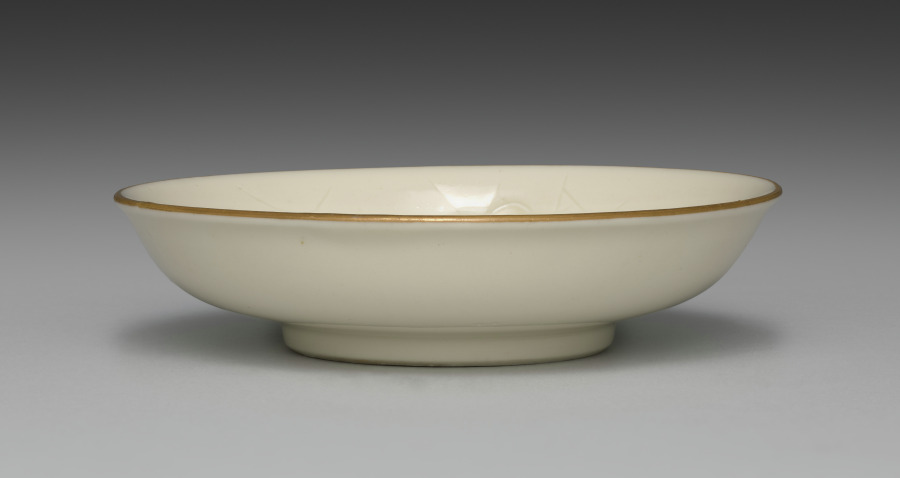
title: Small Dish from Dining Set with Plum Blossoms and Cracked-Ice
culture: Japan, Meiji period (1868–1912)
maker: Seifū Yohei II (Japanese, 1844–1878)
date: c. 1875–78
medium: Porcelain with molded designs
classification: Ceramic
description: Each item in this set has a delicate low-relief design of flowering plum branches over scattered, intersecting lines meant to resemble the cracked-ice surface of a frozen body of water and is signed on the base in gold pigment. While Yohei II produced many fine works in underglaze blue, like those produced by Kiyomizu Shichibei, he also made works in quite different styles later in his career, from the early 1870 s. In 1873, he was appointed purveyor to the Industrial Center of Kyoto Prefecture, a designation associated with Kyoto’s efforts to reach an international market through the port of Kobe; and from 1875 until his death, he was involved in national-level projects to present Japanese ceramics across the world. It was during this period that Yohei III was apprenticed to Yohei II, and it has been suggested that this set may in fact be an early example of Yohei III’s work, which he signed with his teacher’s name. Decorated with flowers resembling Japanese textile motifs, the set calls to mind the design of Yohei II’s pair of vases with plum blossoms in the Victoria and Albert Museum. Here, the elaborate trees created for a formal public exhibition setting have been translated into the approachable blossoms of the genteel domestic environment. While the designs are consistent across the pieces, each raised flower petal and pistil and each incised line in the ice was done by hand, so the cups, bowls, and dishes are similar yet unique. The bottoms of two boxes once identified the set’s owner, but the information has been deliberately obscured with black ink. However, inscriptions still visible appear to indicate two occasions, once at the end of July 1886 , and once again in June 1916 , when parts of the set were requested from Hokura in Niigata Prefecture. The location corresponds to a neighborhood in the present-day city of Jōetsu. The surname Tsuji 辻 also appears on a paper tag affixed to one of the box cloths. Future research may possibly reveal more about their provenance. A vase by Yohei III in a private collection combines the formal grandeur of the Yohei II vases in the Victoria and Albert Museum with the gentler design of this dining set, placing flowering plum trees against soft, scalloped-edge clouds resembling those in golden screens.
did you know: The dining wares have a creamy white coloration that the four boxes containing them identify as Korean in style.